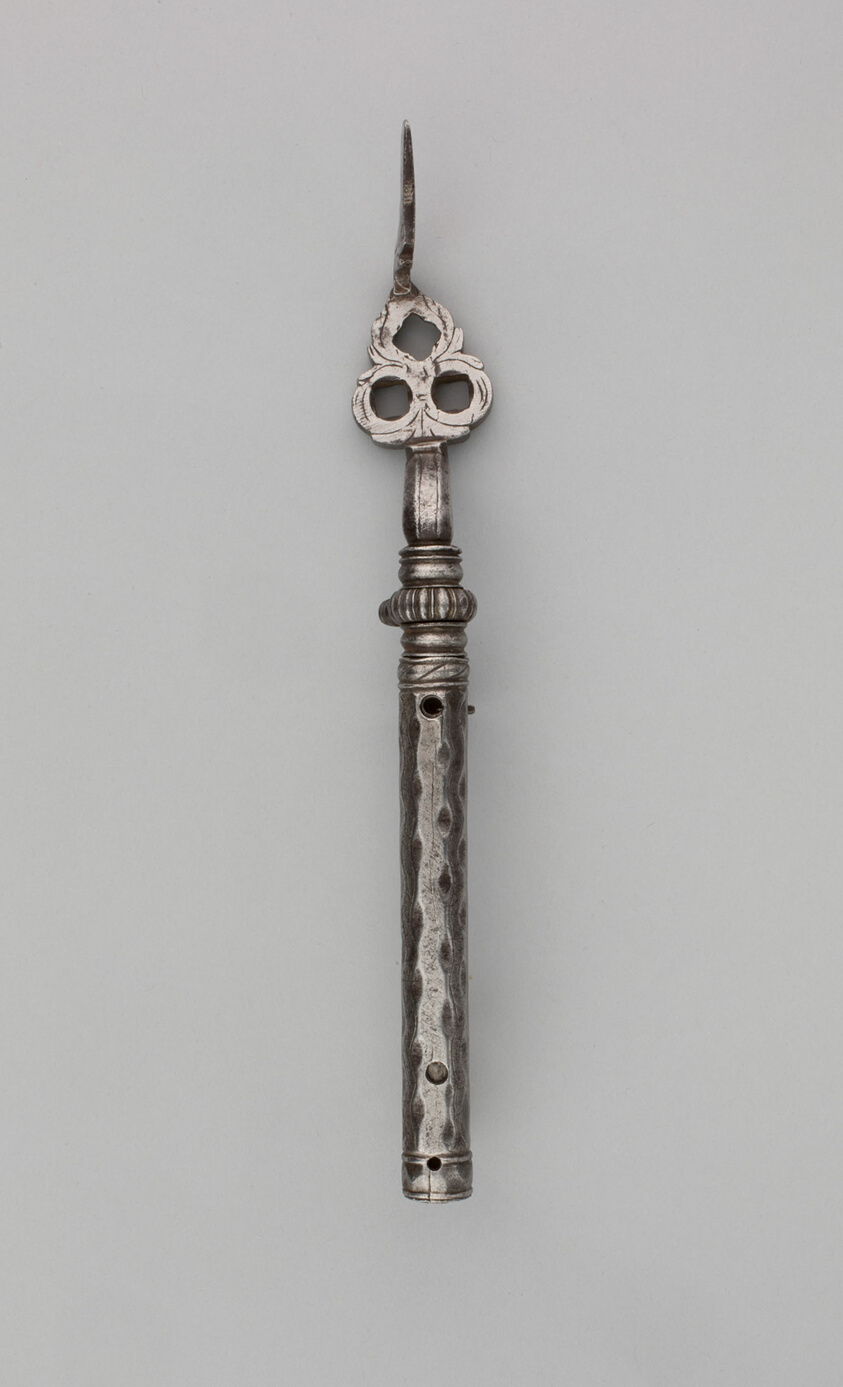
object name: Arms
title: Wheel-Lock Spanner, Turnscrew, and Adjustable Powder-Measure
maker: German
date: first half of 17th century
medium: Steel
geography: Germany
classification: firearm-accessory; arms; arms and armor